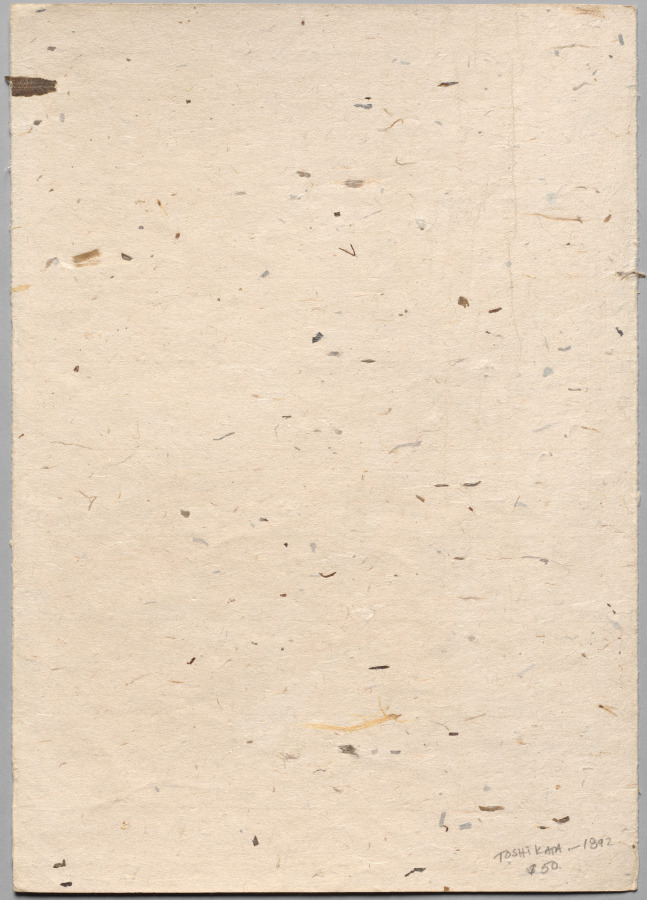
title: The Fourth Month, A Lady of the Enkyō Era (1744-48), from the series Thirty-six Elegant Selections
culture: Japan, Meiji period (1868–1912)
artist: Mizuno Toshikata (Japanese, 1866–1908)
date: 1894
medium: Woodblock print, ink and color on paper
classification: Print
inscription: Inscription Type: series title Inscription Transliteration: 三十六佳撰 Inscription Romanization: Sanjūrokkasen Inscription translation: The Thirty-six Elegant Selections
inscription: Inscription Transliteration: 卯月延享頃婦人 Inscription Romanization: Uzuki, Enkyō koro fujin Inscription translation: Fourth Month, A Lady of the Enkyō Era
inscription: Inscription Type: artist’s signature Inscription Transliteration: 年方 Inscription Romanization: Toshikata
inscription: Inscription Type: artist’s seal Inscription Transliteration: 應斎年方 Inscription Romanization: Ōsai Toshikata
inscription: Inscription Type: engraver’s seal Inscription Transliteration: えん活刀 Inscription Romanization: En-Katsu to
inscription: Inscription type: date and publisher’s information Inscription Translation: Meiji 27 (1894) Akiyama Buemon (summary)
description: Each of the prints in the series Thirty-six Elegant Selections features a woman from a different time period, as befits an artist who was interested in history painting. Most of the prints are set in the Edo period (1615–1868). Mizuno Toshikata was a favored student of Tsukioka Yoshitoshi (1839–1892), and took over his post as a newspaper illustrator.